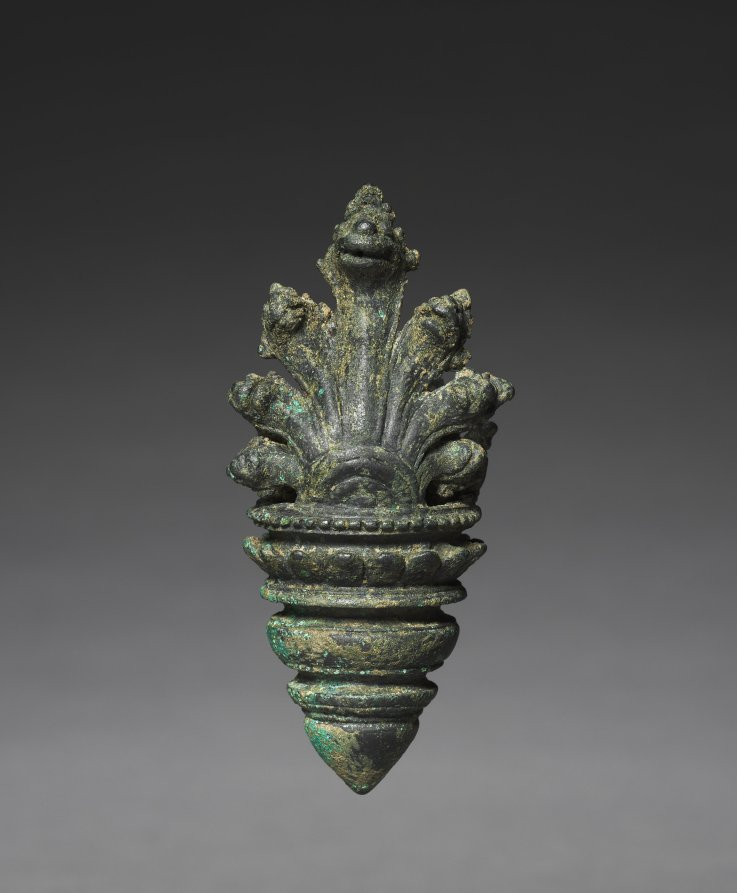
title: Earring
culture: Cambodia, Angkorean Period (877-1431)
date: c. 1100s–1200s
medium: bronze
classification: Jewelry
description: Earrings that were cast in bronze and then gilded (on this example, the gilding has worn off) were attached to the stone sculptures themselves. The serpent, a Khmer national emblem, was used frequently as an ornamental motif. The historical Buddha Shakyamuni was born a prince in northern India in the late 500s BC, and he wore heavy earrings that dragged down his earlobes. When he renounced worldly life to seek enlightenment, he cast off all his jewels. Generally, Buddha images have elongated earlobes without earrings, while bodhisattvas—beings close to full enlightenment—wear princely jewels in reference to Shakyamuni’s princely life just before he became a Buddha. By the early 1200s in Cambodia, however, these categories had become more nuanced: the bodhisattva Lokeshvara was viewed as such a potent figure he was sometimes called a Buddha and images of some special Buddhas other than Shakyamuni were distinguished by their jewelry.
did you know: This earring is topped with the form of a naga, a water serpent with a multi-headed hood.